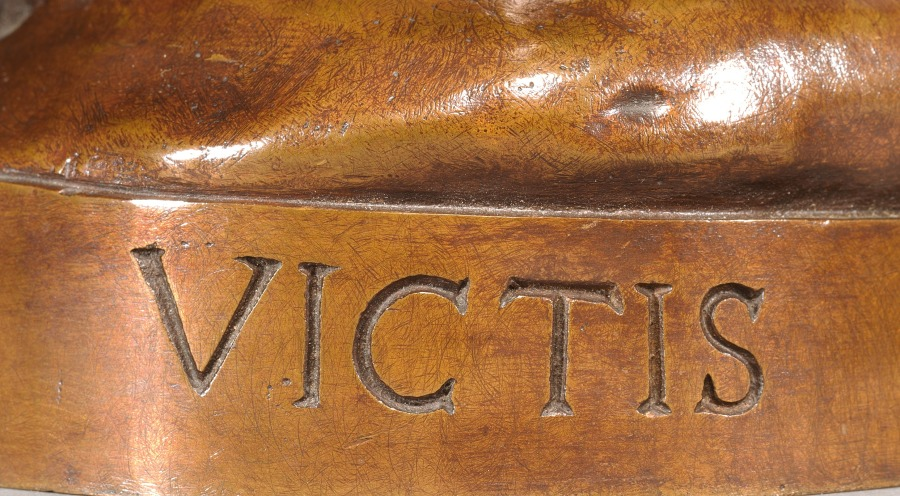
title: Gloria Victis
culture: France, 19th century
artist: Antonin Mercié (French, 1845–1916)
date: c. 1880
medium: bronze with gilding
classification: Sculpture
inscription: Signed near foot at right: "A. MERCIE."; inscribed rear: "F. BARBEDIENNE. FONDEUR."; inscribed front of base: "GLORIA VICTIS."